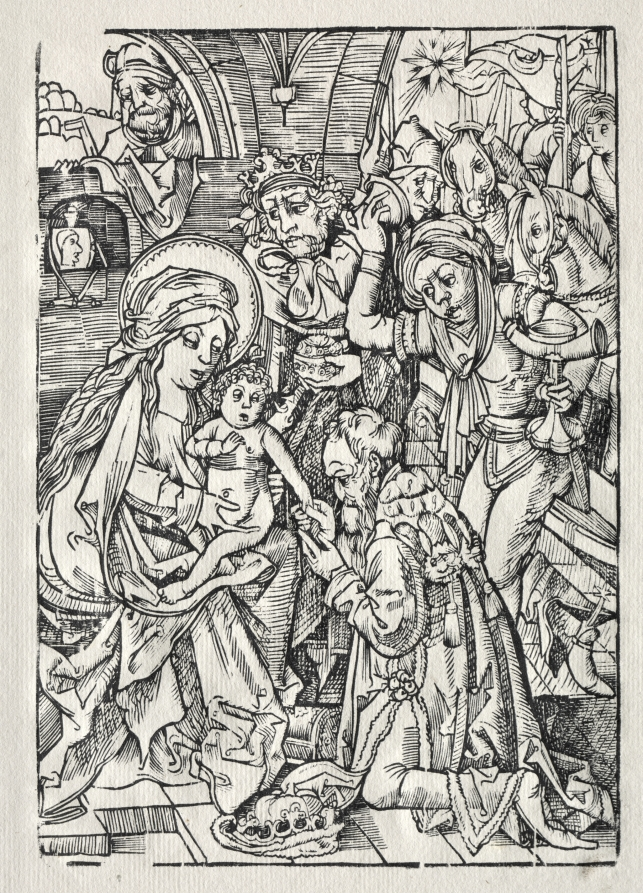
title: Adoration of the Kings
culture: Germany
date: c. 1500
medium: woodcut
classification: Print